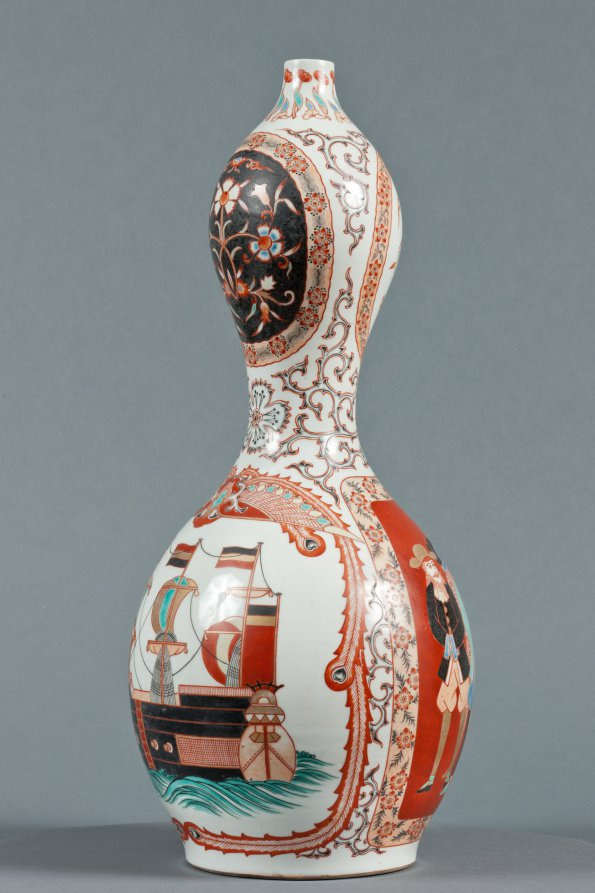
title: Bottle with Western Ships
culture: Japan, Edo period (1615–1868)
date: c. 1800–1868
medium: Porcelain with decoration in colored enamels and underglaze blue, overglaze enamels, and gold (Hizen ware, Arita type)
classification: Ceramic